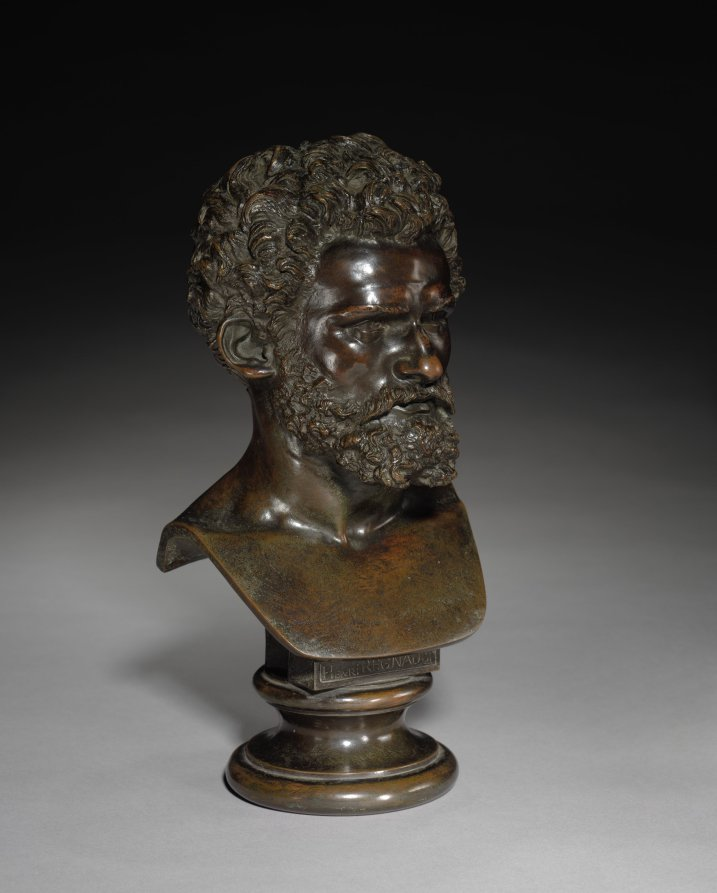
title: Henri Regnault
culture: France, 19th century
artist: Louis-Ernest Barrias (French, 1841–1905)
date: 1871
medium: bronze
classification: Sculpture